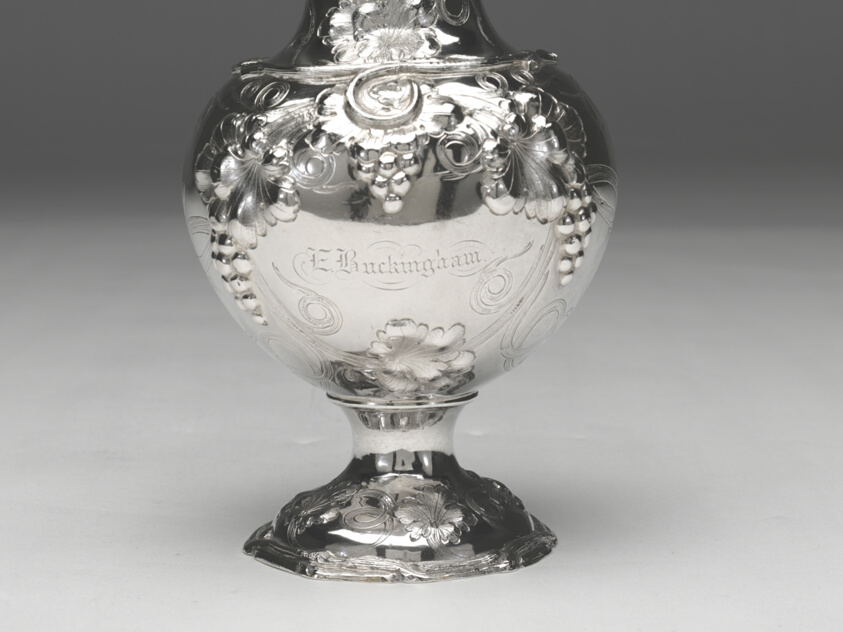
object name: Metalwork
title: Tea and Coffee Service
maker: Francis W. Cooper; American, active 1840–1851; New York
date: 1840–51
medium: Silver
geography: New York City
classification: tea service; silver; american decorative arts; american arts; decorative arts